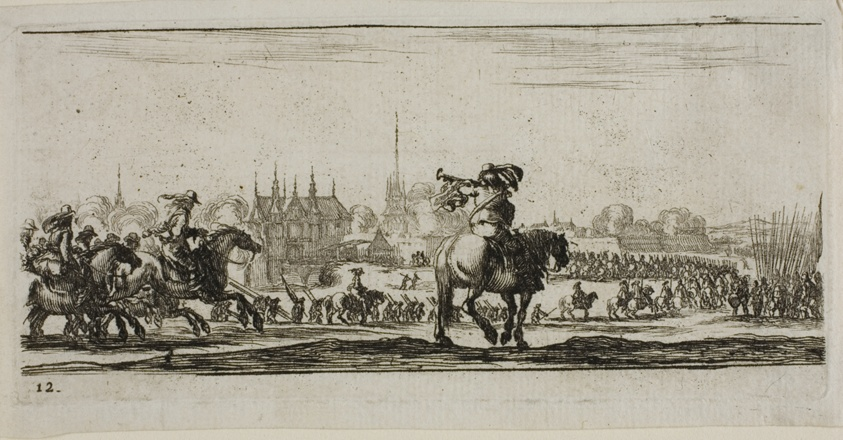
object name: Print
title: Plate Twelve from Drawings of Several Movements by Soldiers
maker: Stefano della Bella (Italian, 1610-1664)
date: 1644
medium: Etching on ivory laid paper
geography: Italy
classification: etching; paper; print; prints and drawing